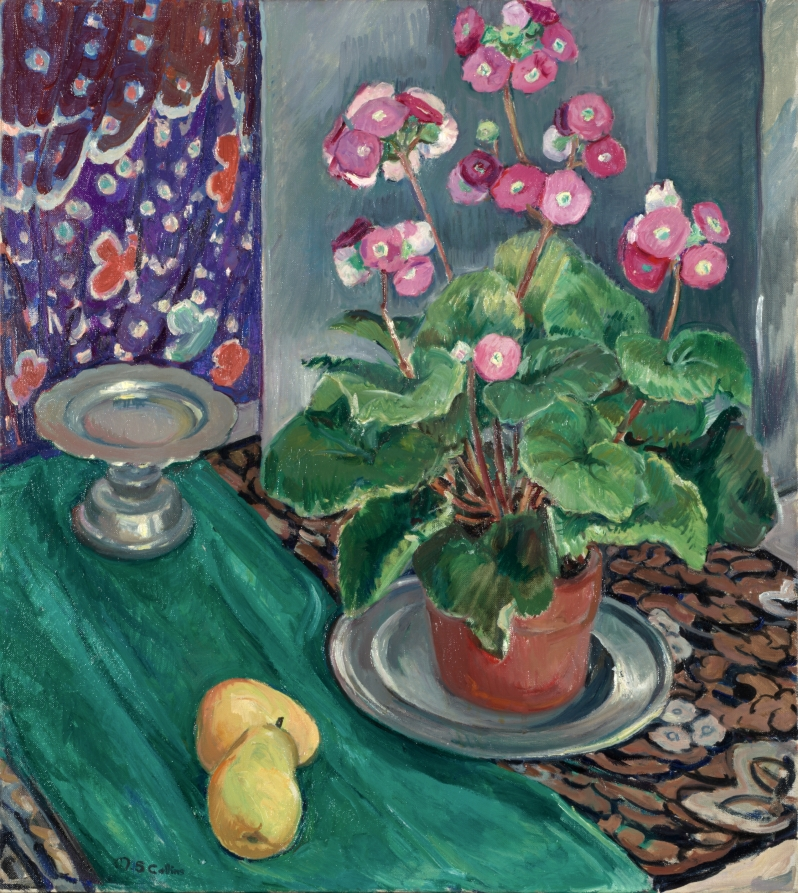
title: Primrose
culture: America, Ohio, Cleveland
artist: Mary Susan Collins (American, 1880–1967)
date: 1929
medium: oil on canvas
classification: Painting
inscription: signed lower left: M. S. Collins.